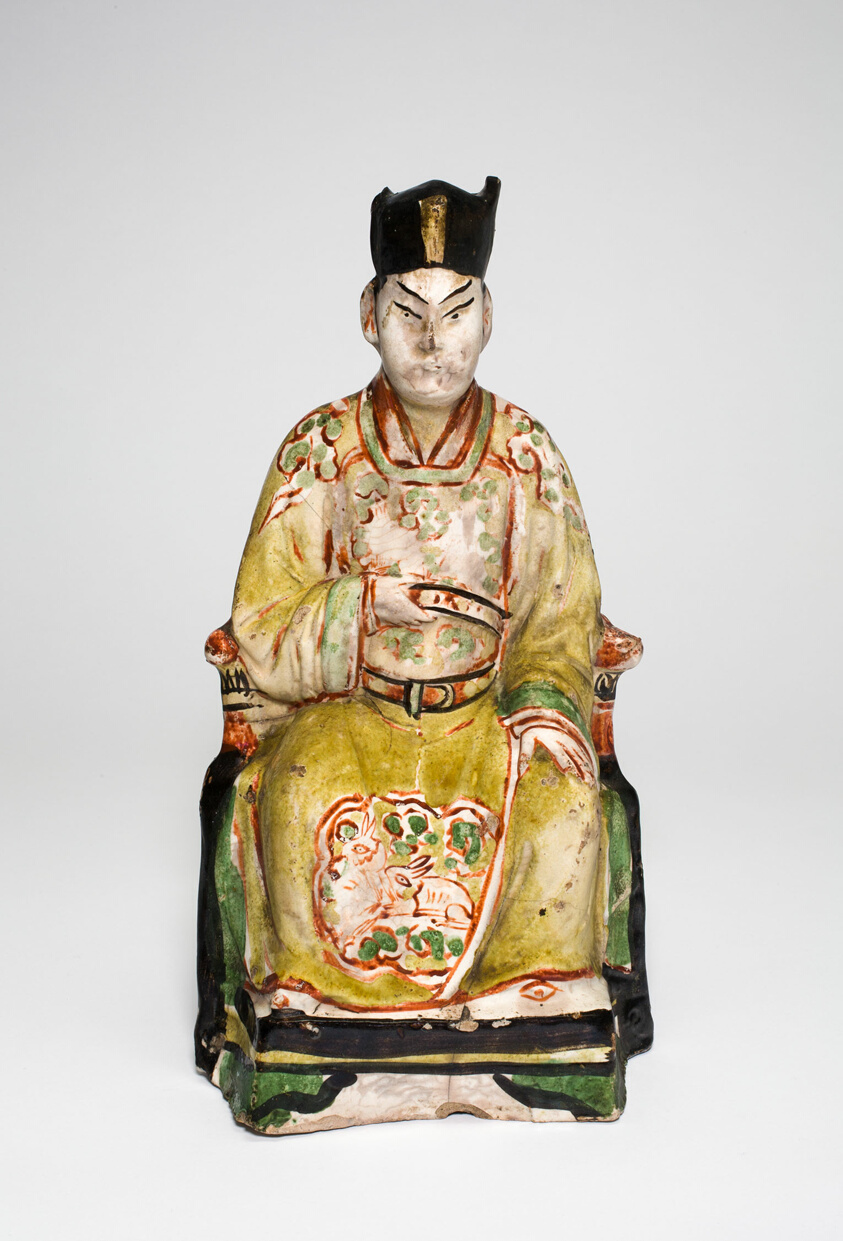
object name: Sculpture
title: Seated Scholar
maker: China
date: Song dynasty (960–1279)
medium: Cizhou ware; slip-coated stoneware with iron brown and yellow, green and red glazes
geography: China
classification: stoneware; asian art; ceramics